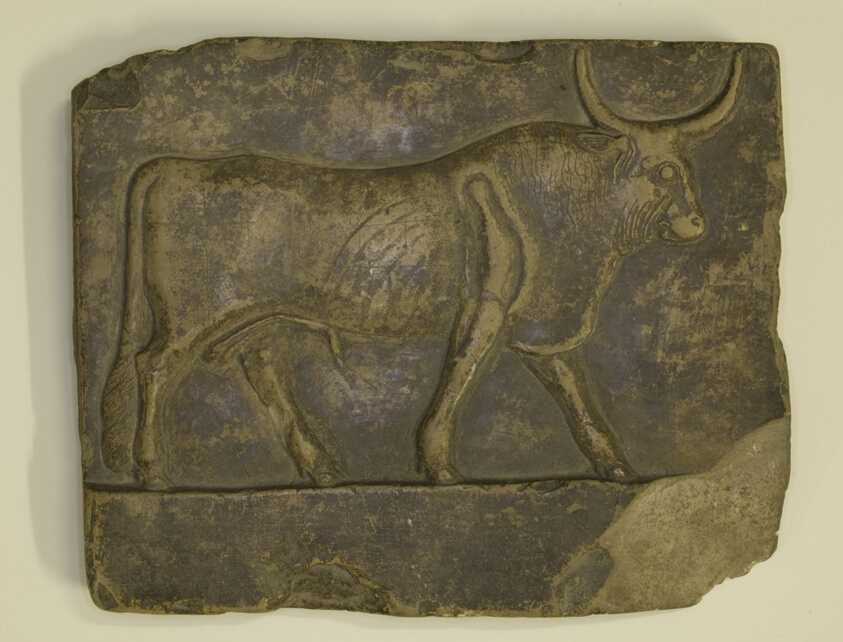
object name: Architectural fragment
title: Relief of a Bull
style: ptolemaic, egyptian, ancient, greco-roman (egyptian)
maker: Egyptian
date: Early Ptolemaic Period, about 300 BCE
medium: Limestone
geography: Egypt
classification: plaque (flat object); stone; sculpture; ancient art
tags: bull, animals, bulls